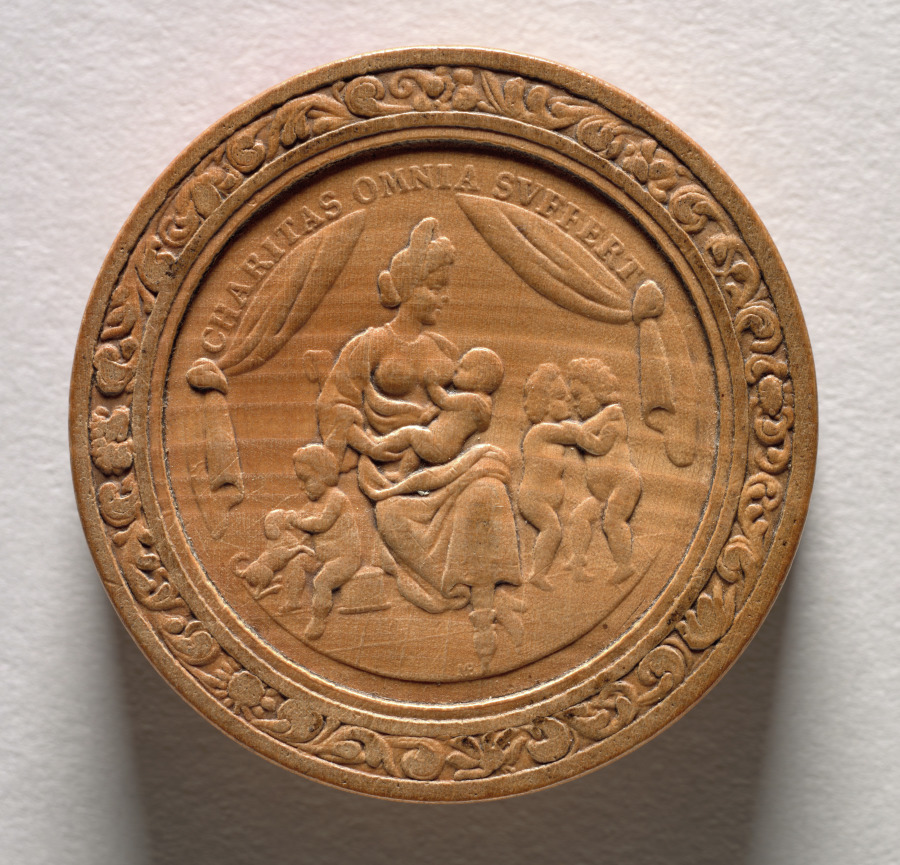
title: Gaming Piece (obverse)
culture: Germany, late 17th-early 18th Century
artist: Martin Brunner (German, 1659–1725)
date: c.1700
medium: wood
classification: Furniture and woodwork